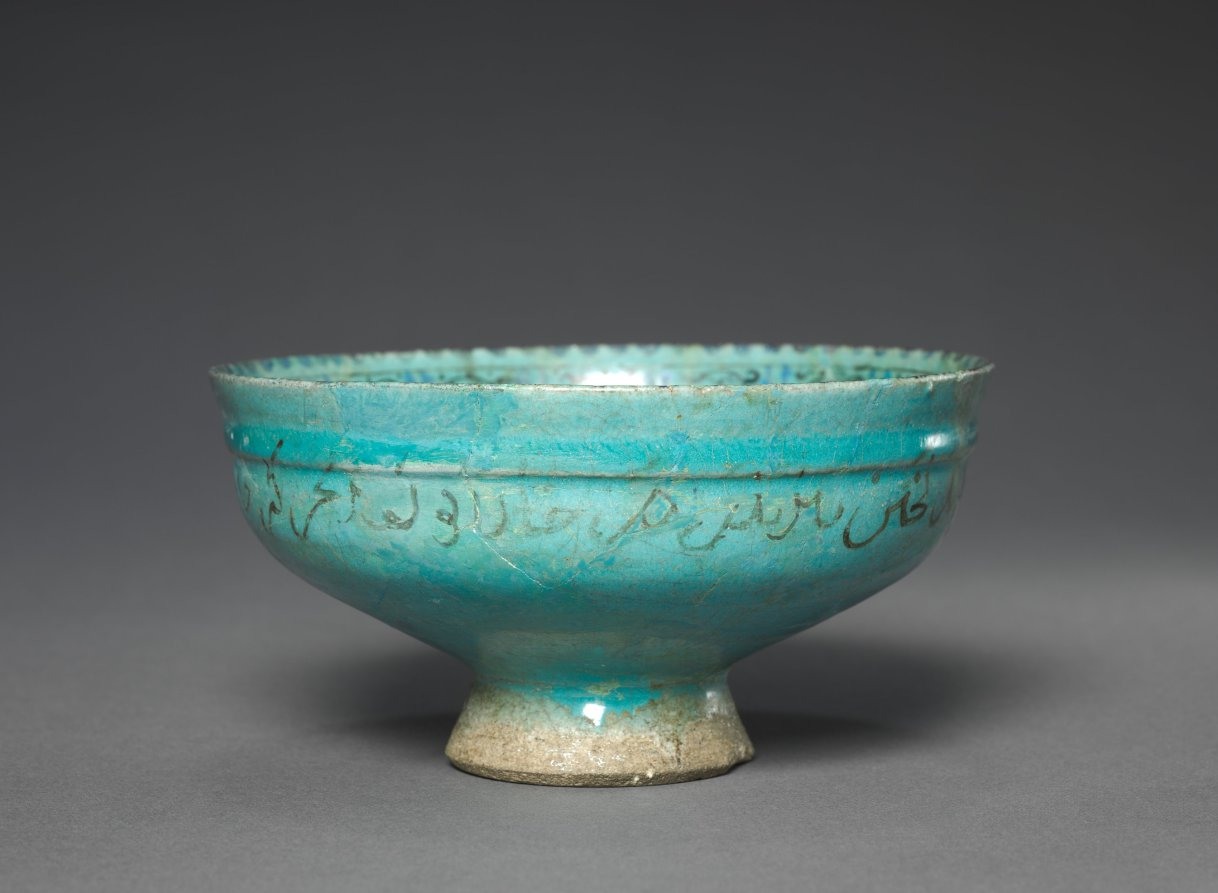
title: Bowl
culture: Iran, probably Kashan, 12th-13th century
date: 1150–1220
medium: fritware with overglaze-painted design (minai ware)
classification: Ceramic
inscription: Around the rim in a band of Kufic inscriptions.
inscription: A band of black Naskhi script is on the outside of the bowl.